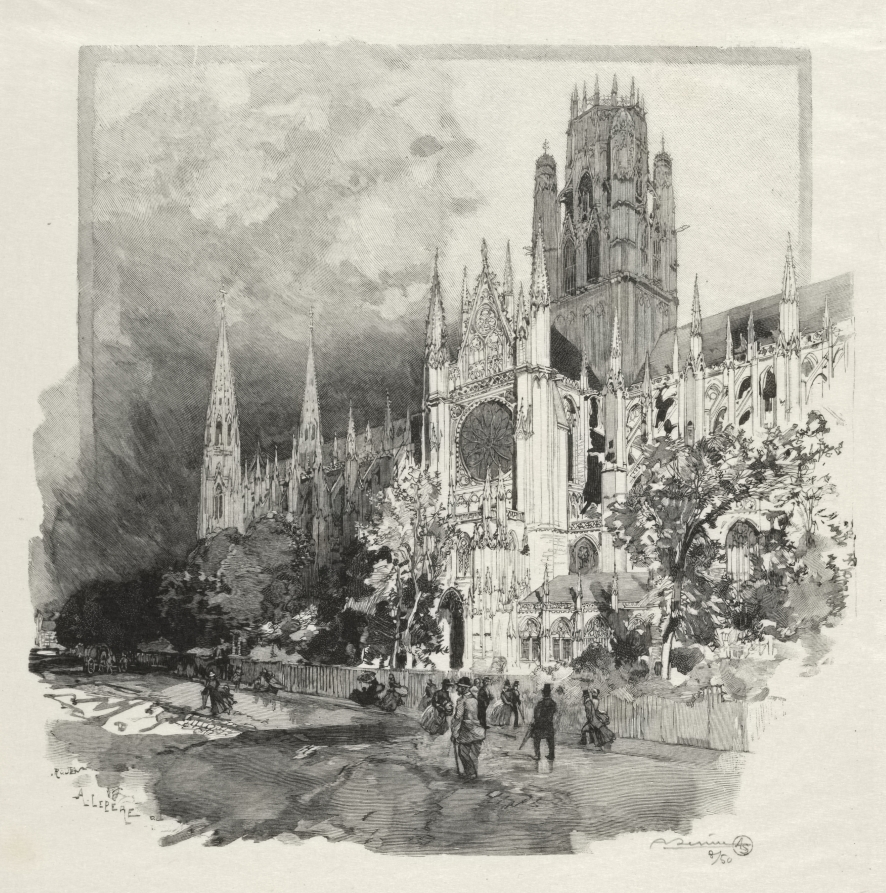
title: Rouen Illustré: Eglise Saint Ouen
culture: France, 19th century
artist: Auguste Louis Lepère (French, 1849–1918)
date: 1896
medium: wood engraving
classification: Print